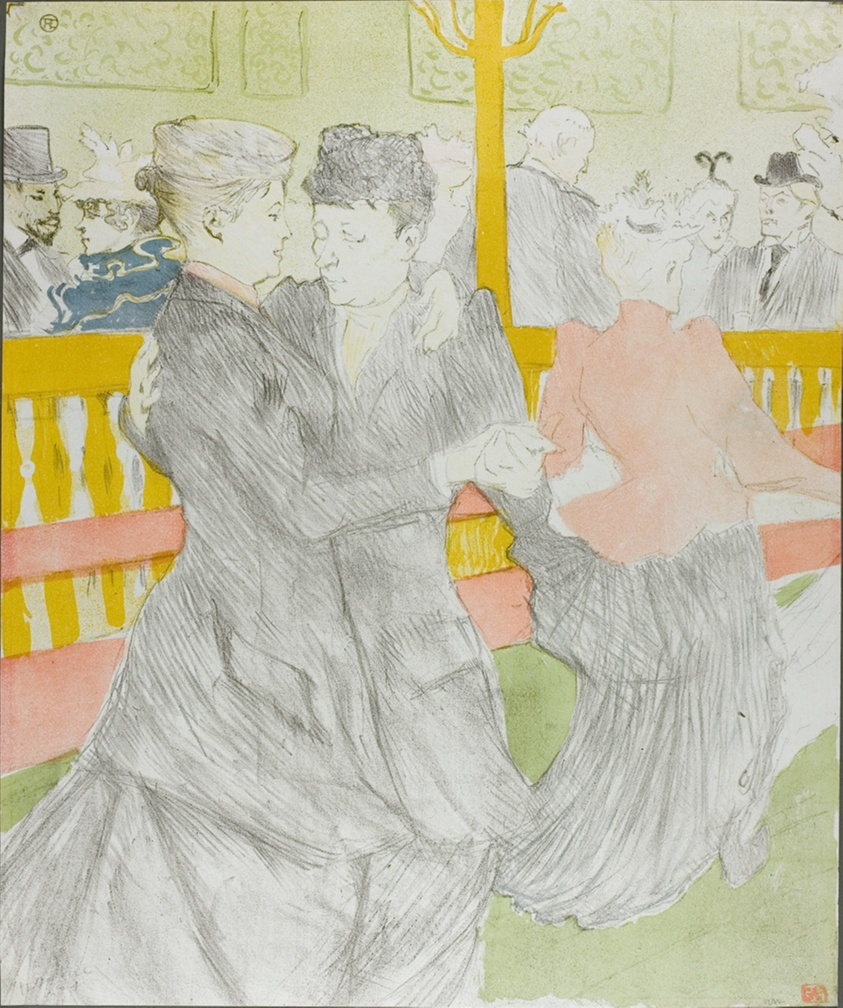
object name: Print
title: Dance at the Moulin Rouge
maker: Henri de Toulouse-Lautrec (French, 1864-1901)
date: 1897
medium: Color lithograph on grayish-ivory laid China paper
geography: France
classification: lithograph; print; prints and drawing